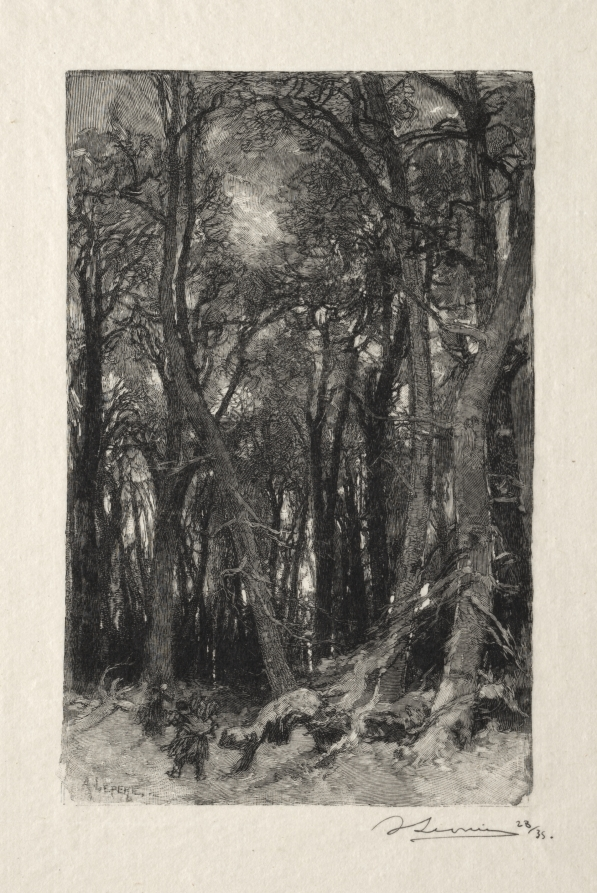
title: Le Bas Bréau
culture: France, 19th-20th century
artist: Auguste Louis Lepère (French, 1849–1918)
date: 1887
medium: wood engraving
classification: Print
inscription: On block, lower left corner: "A. Lepère"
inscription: Signed in ink, 28/35